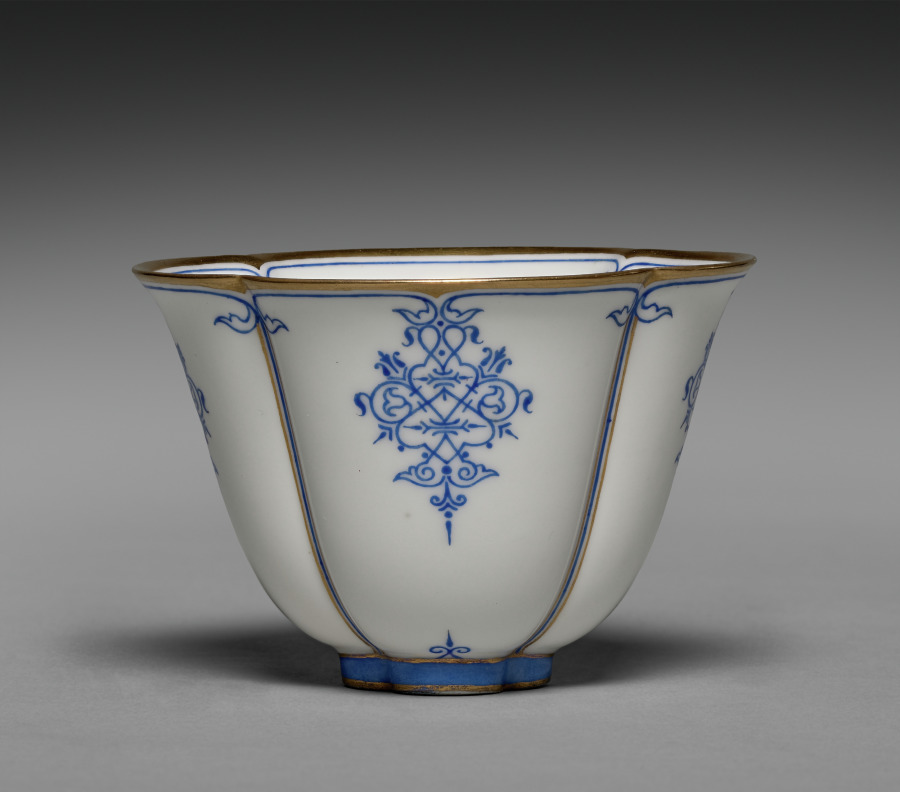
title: Cup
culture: France, Sèvres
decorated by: Guyonnet (French)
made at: Sèvres Porcelain Factory (French, est. 1756)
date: c. 1848–55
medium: hard-paste porcelain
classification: Ceramic